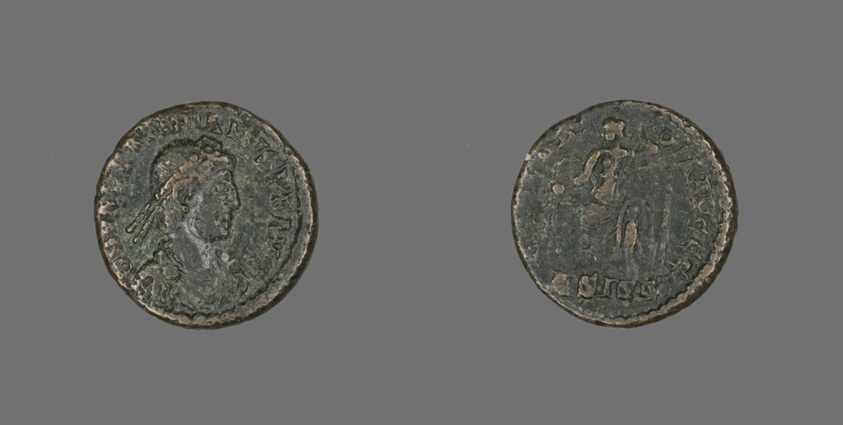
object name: Coin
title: Coin Portraying Emperor Valentinian II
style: roman (ancient, style or period), ancient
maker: Roman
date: 375-392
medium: Bronze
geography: Roman Empire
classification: coin; ancient art